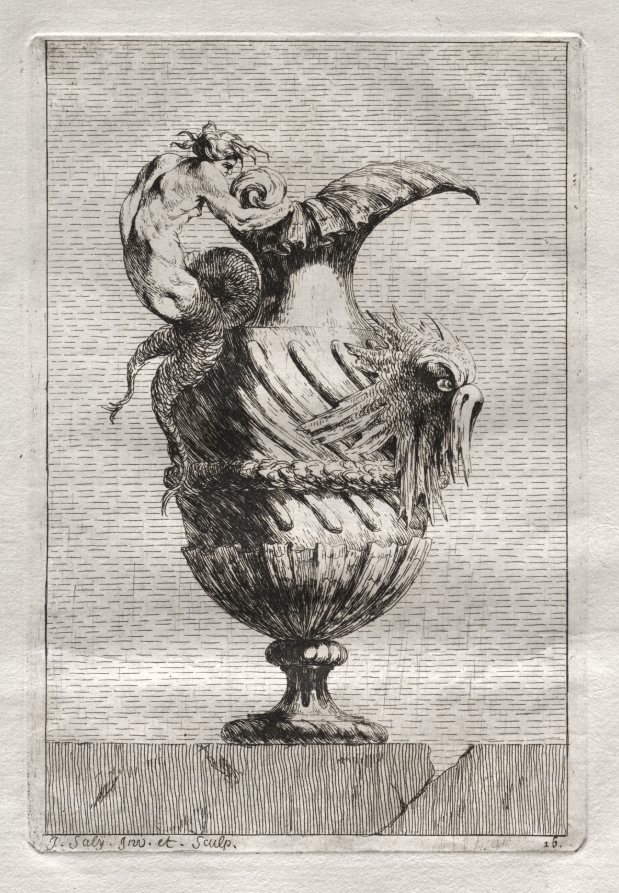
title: Suite of Vases: Plate 16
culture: France, 18th century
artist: Jacques François Saly (French, 1717–1776)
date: 1746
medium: etching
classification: Print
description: Designing ornamental vases or urns was particularly popular during the mid-18th century since the only limit to the possibilities was the imagination of the artist. Saly, a sculptor by training, was a student at the French Academy in Rome from 1740 to 1746, at which time he published a set of 30 etchings. Saly began with basic antique vase forms but deviated from classical ornament to use a rich variety of fantastic creatures for embellishment.